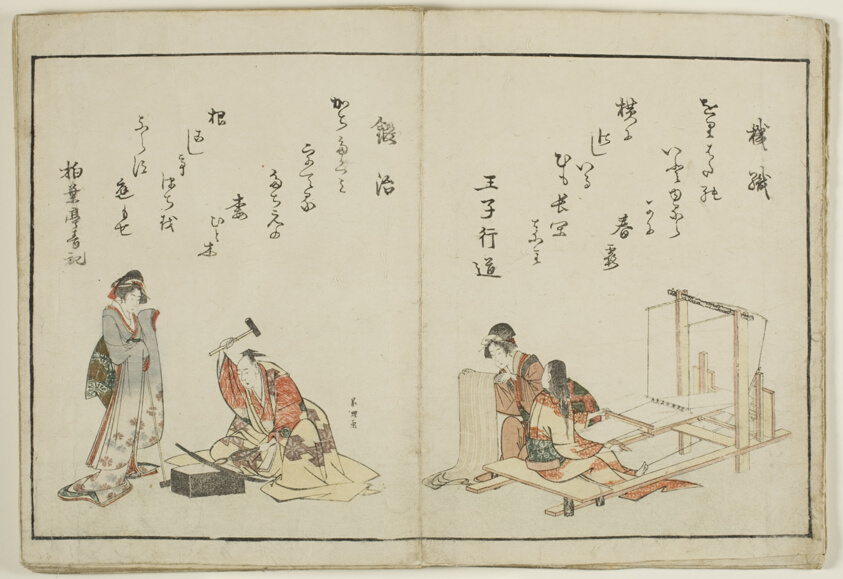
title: Kyoka Ehon Shokunin Kagami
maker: Katsushika Hokusai (1760-1849); Japanese; Kumahawa Shohin (calligrapher); Japanese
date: 1803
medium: Woodblock printed book, original covers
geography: Japan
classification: book; asian art